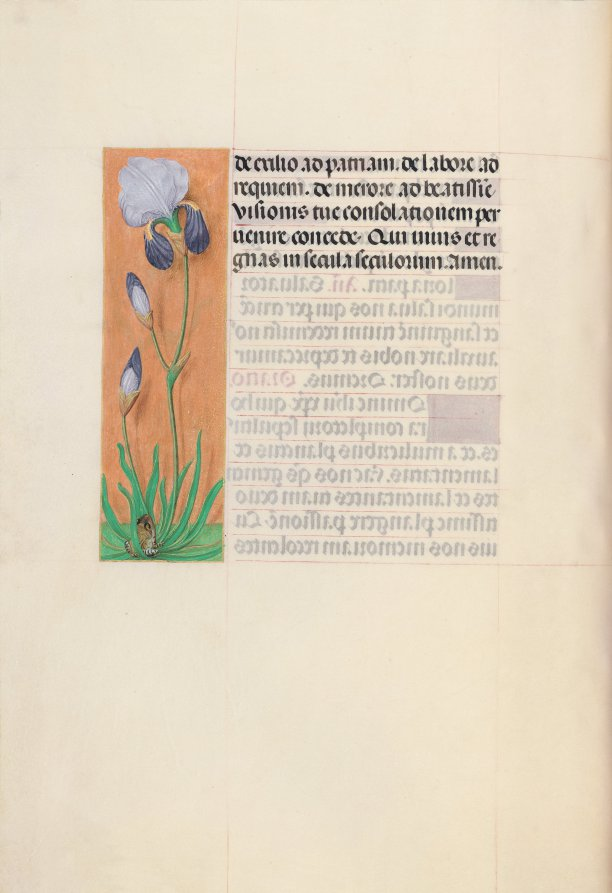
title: Hours of Queen Isabella the Catholic, Queen of Spain: Fol. 79v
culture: Flanders, Ghent and Bruges, late 15th century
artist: Master of the First Prayerbook of Maximillian (Flemish, c. 1444–1519)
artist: and Associates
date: c. 1500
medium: ink, tempera, and gold on vellum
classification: Bound Volume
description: This manuscript was illuminated by a circle of at least five highly organized manuscript painters active in the Flemish cities of Ghent and Bruges. The principal illuminator was Alexander Bening, who painted the majority of the book's miniatures. Manuscripts produced by this circle of artists are renowned for the decoration of their borders, which typically feature a rich variety of realistically-painted flowers, birds, and butterflies. This prayer book, called a book of hours, was intended not for a cleric, but for the private devotions of a lay person-in this case, Isabella the Catholic, Queen of Spain (1451-1504). Isabella's coat of arms embellishes the book's frontispiece. It is unlikely that the book was commissioned by the Queen herself; rather, she probably received it as a diplomatic gift from someone courting her patronage, perhaps Cardinal Francisco Jimenez de Cisneros. A Franciscan friar, Jimenez was dependent upon Isabella for his advancement, first to the post of Queen's confessor in 1492, and then to Archbishop of Toledo in 1495.